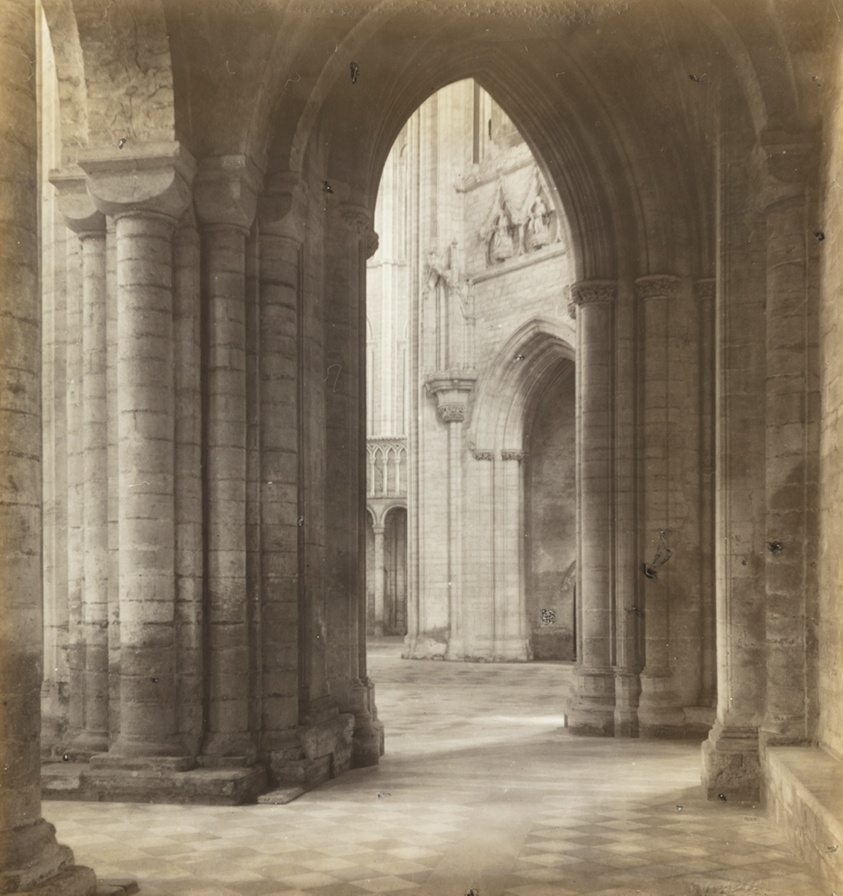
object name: Photograph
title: Ely Cathedral: Late Afternoon Across the Transepts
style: Pictorialism, 19th century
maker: Frederick H. Evans (English, 1853–1943)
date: c. 1891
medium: Lantern slide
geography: England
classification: photograph; photography